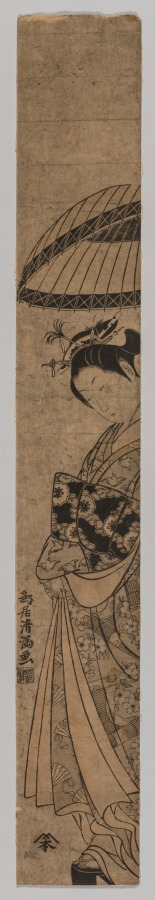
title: A Beautiful Woman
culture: Japan, Edo period (1615–1868)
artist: Torii Kiyomitsu (Japanese, 1735–1785)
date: 1735–1785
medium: color woodblock print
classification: Print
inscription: Signature: Torii Kiyomitsu gwa